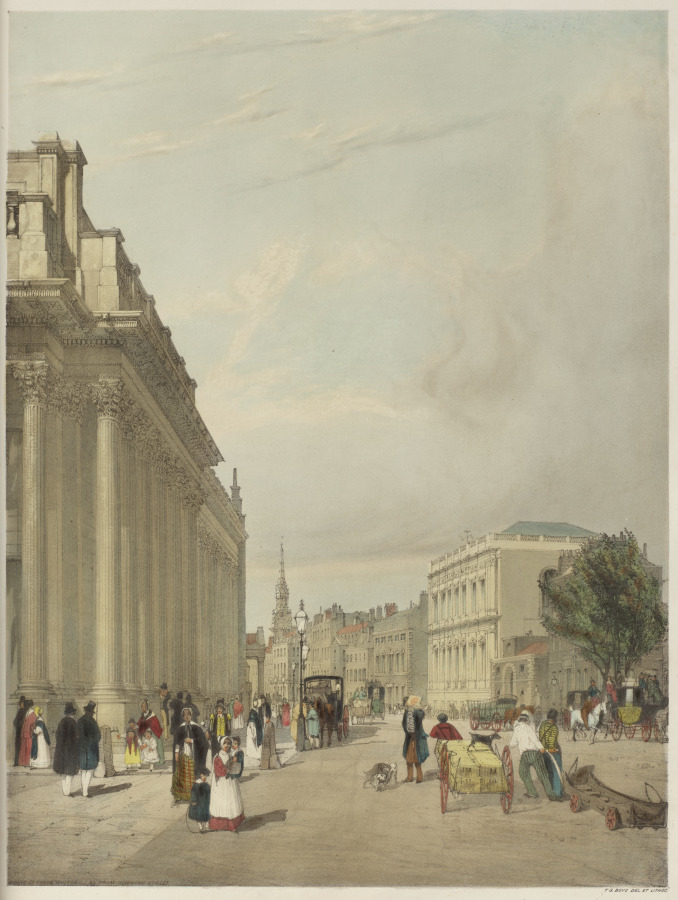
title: London As It Is: Board of Trade, Whitehall, from Downing Street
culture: England, 19th century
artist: Thomas Shotter Boys (British, 1803–1874)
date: 1842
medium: lithograph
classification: Bound Volume